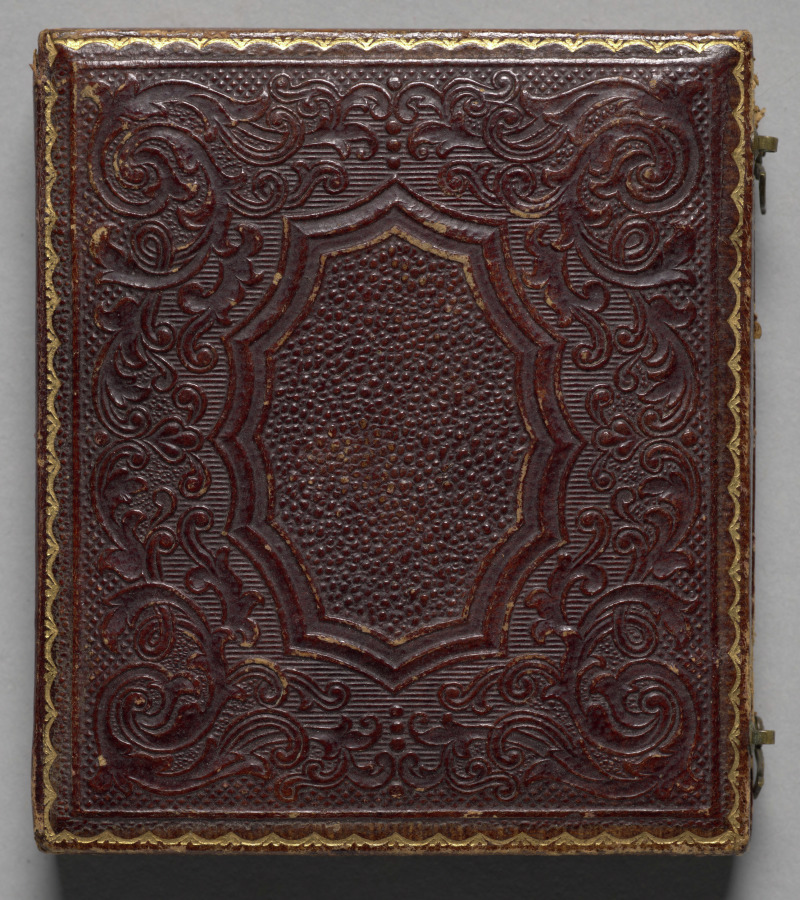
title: Urban Worker Smoking Tyrolean Pipe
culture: America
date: c. 1855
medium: ambrotype, sixth plate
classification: Photograph